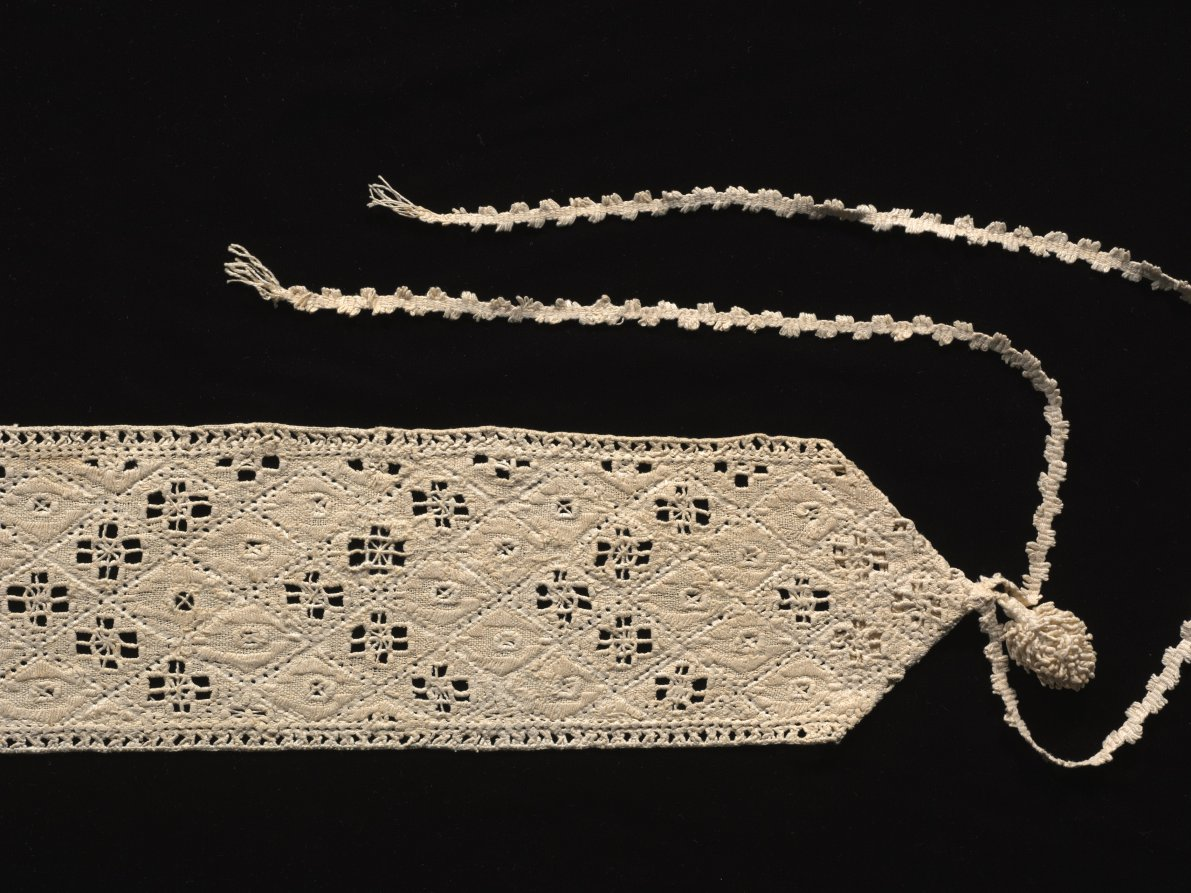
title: Swaddling Band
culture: Italy, Sicily, 1500s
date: 1500s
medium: Linen: needle lace (cutwork) with tassel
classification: Lace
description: The narrow flat band attached to the end of this swaddling band is called a fascia.